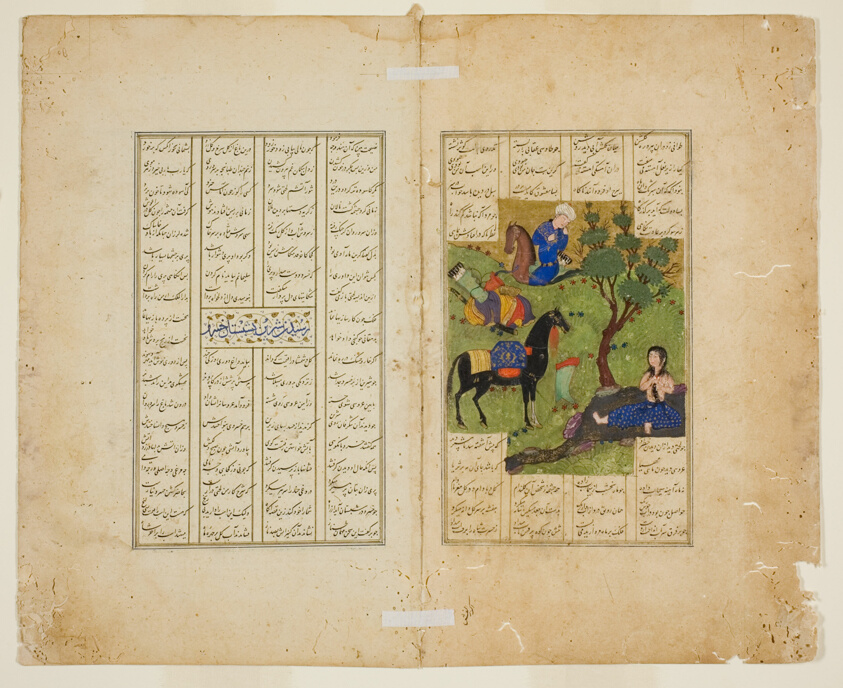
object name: Drawing and Watercolor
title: Khusrau Gazing at Shirin, from a copy of the Khamsa of Nizami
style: Islamic (culture or style)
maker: Iran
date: 1485 (890 A.H.)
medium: Opaque watercolor on paper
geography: Iran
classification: miniature painting; painting; asian art